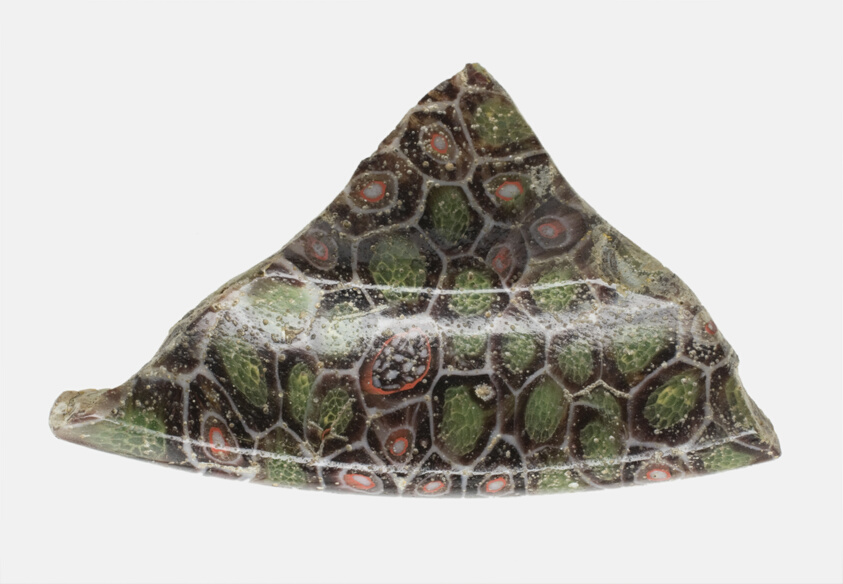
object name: Decorative Arts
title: Fragment of a Cup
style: ancient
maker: Roman or Eastern Mediterranean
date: 1st century BCE–1st century CE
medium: Glass, mosaic technique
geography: Roman Empire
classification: fragment; decorative arts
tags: decoration